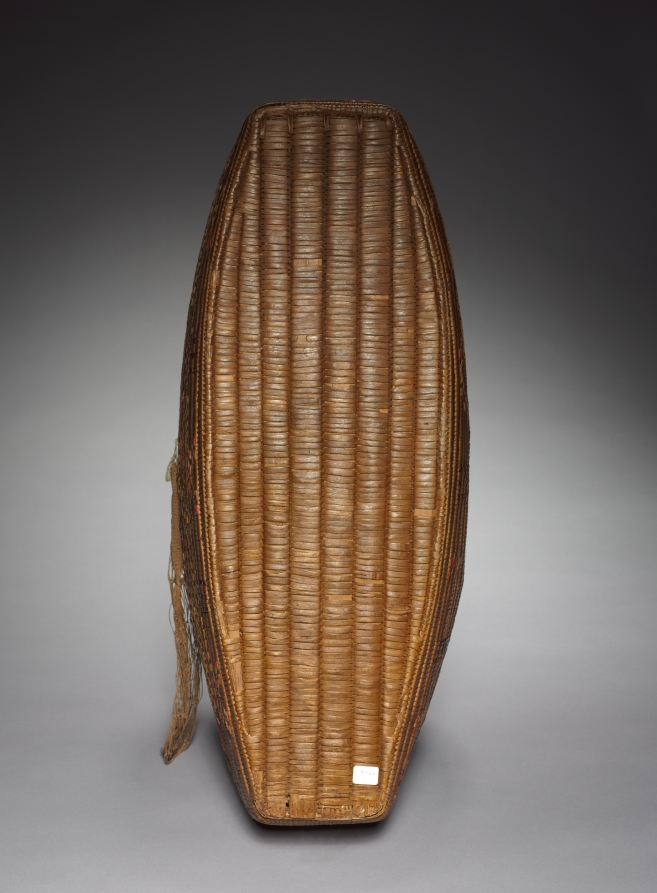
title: Baby Basket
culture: Northwest Coast, Frazer River, Salish, Late 19th century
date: c 1875– 1910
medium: basketry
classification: Basketry